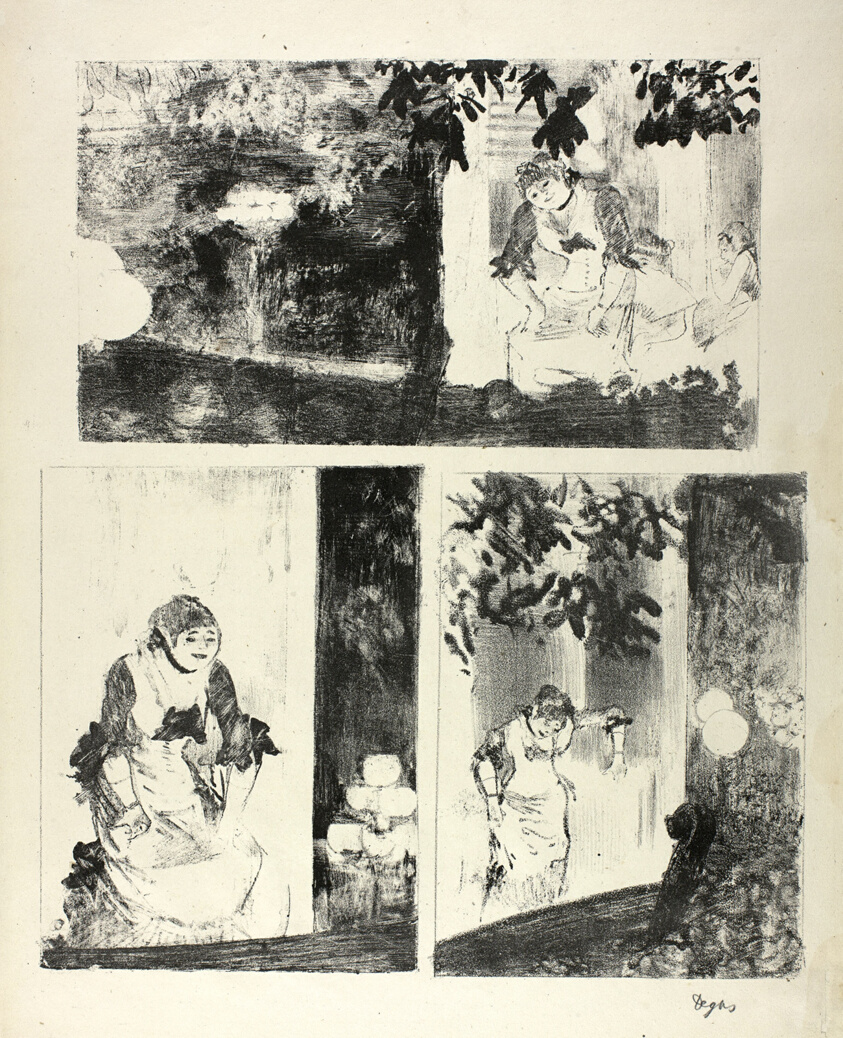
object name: Print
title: Mlle Bécat at the Café des Ambassadeurs: Three Motifs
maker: Edgar Degas; French, 1834-1917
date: c. 1875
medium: Lithograph, transferred from monotypes, on ivory wove paper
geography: France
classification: lithograph; print; prints and drawing; paper